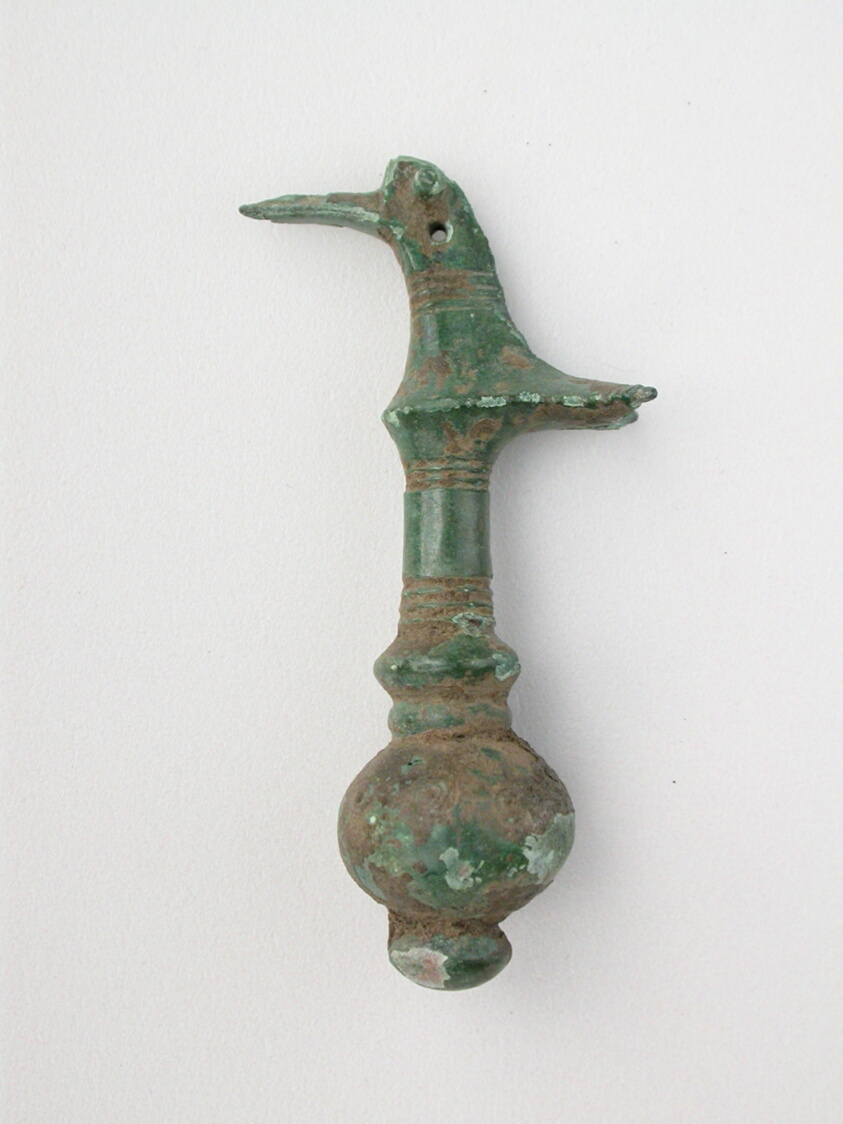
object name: Sculpture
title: Bird on a Knob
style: geometric, ancient, greek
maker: Greek; Thessaly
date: Geometric Period (800–600 BCE)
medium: Bronze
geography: Greece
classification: votive offering; ex-voto; sculpture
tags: bird